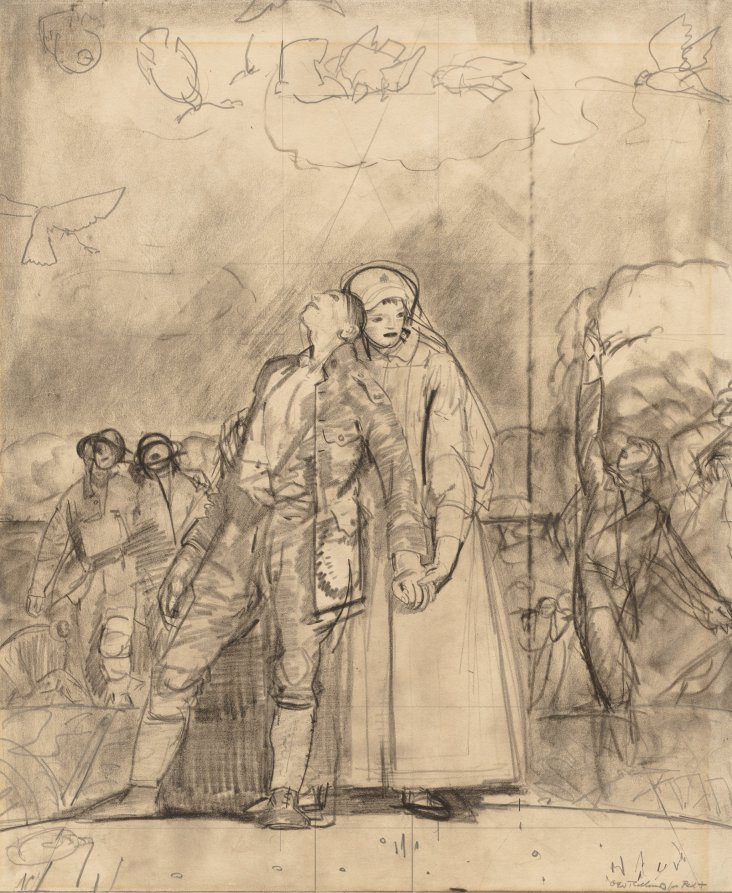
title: The Eve of Victory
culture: America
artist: George Bellows (American, 1882–1925)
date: 1918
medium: charcoal and graphite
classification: Drawing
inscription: Signed in pencil, lower right corner: "Geo. Bellows for Red"